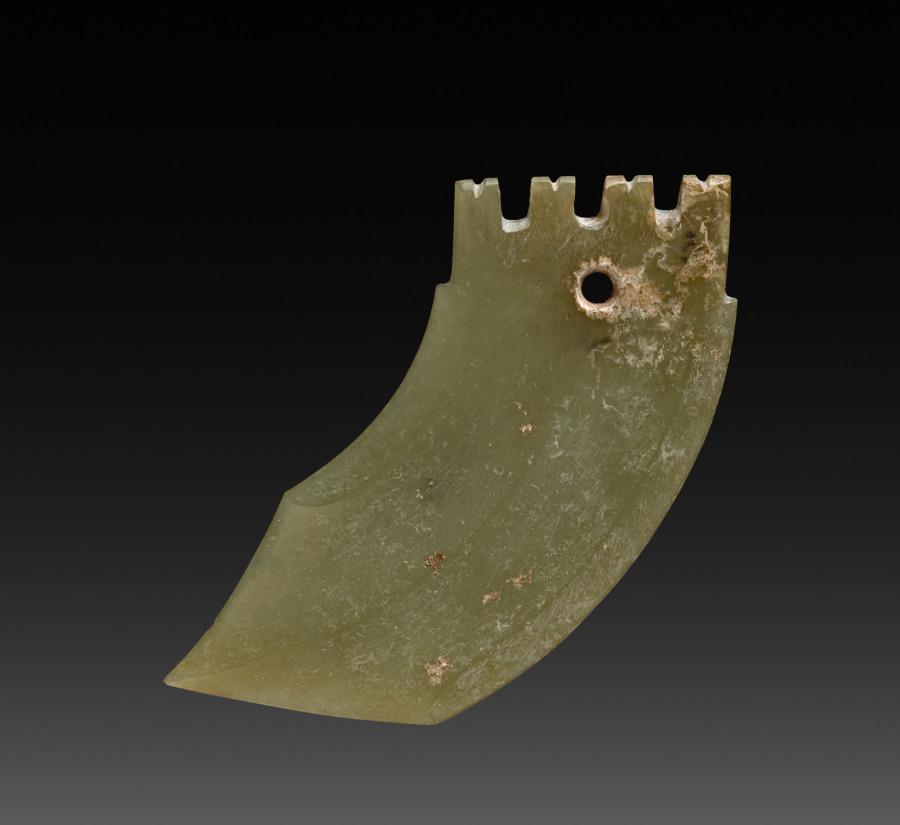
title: Dagger-Axe Shaped Pendant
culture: China, Shang dynasty (c. 1600–c. 1046 BCE) to Western Zhou dynasty (c. 1046–771 BCE)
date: 1200–1000 BCE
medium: jade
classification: Jade